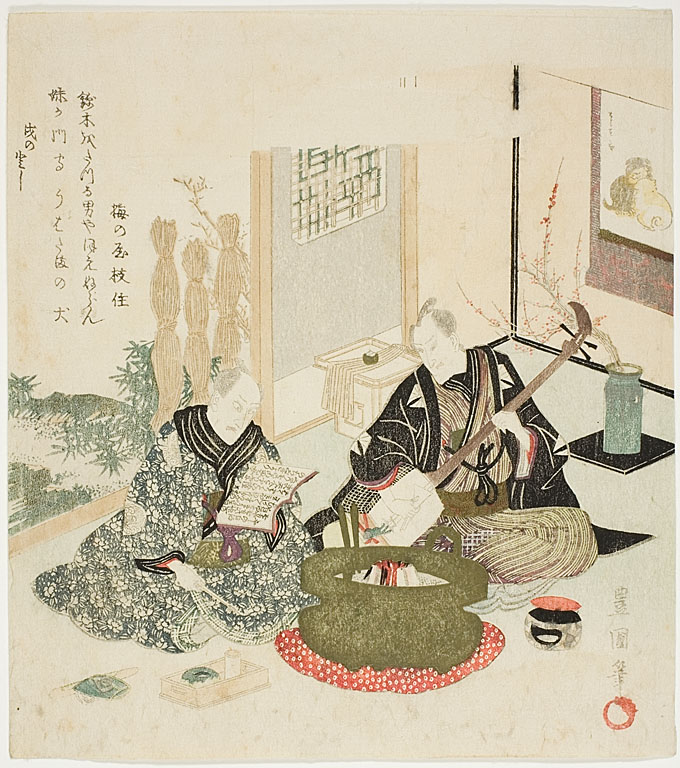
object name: Print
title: Reading and Playing Shamisen in Winter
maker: Utagawa Toyokuni I 初代 歌川 豊国; Japanese, 1769–1825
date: late 18th to early 19th century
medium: Color woodblock print; surimono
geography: Japan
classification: woodblock print; print; asian art